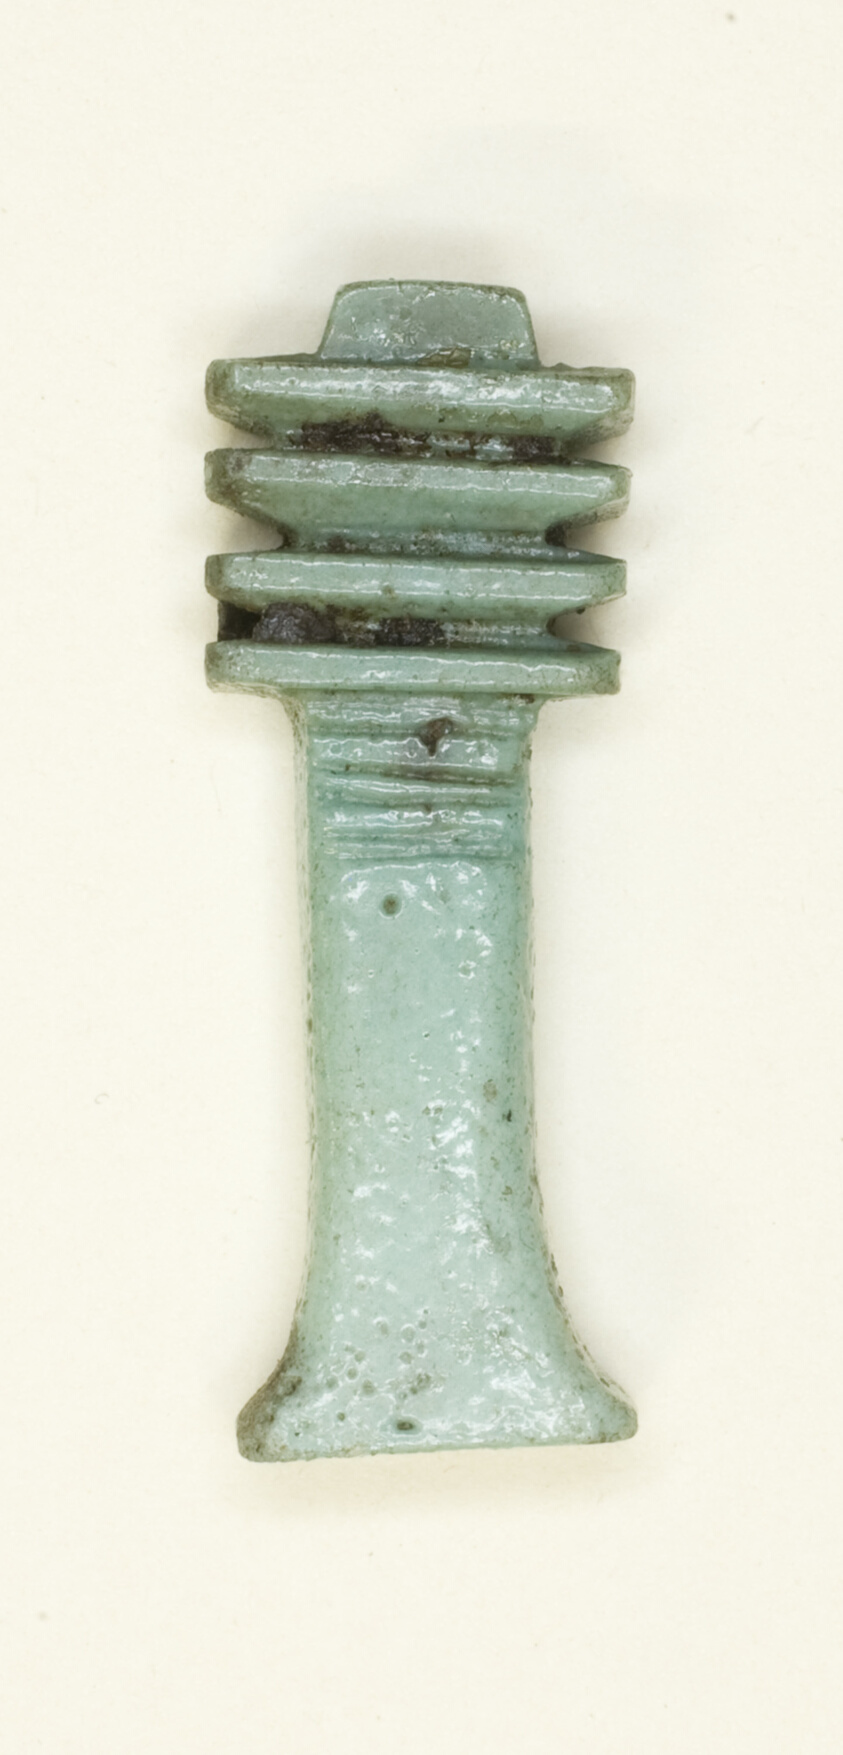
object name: Costume and Accessories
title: Amulet of a Djed Pillar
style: third intermediate period, egyptian, ancient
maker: Egyptian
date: Third Intermediate Period–Ptolemaic Period (about 1069–30 BCE)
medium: Faience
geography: Egypt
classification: amulet; jewelry; ceramics; ancient art; costume; faïence (composite material)